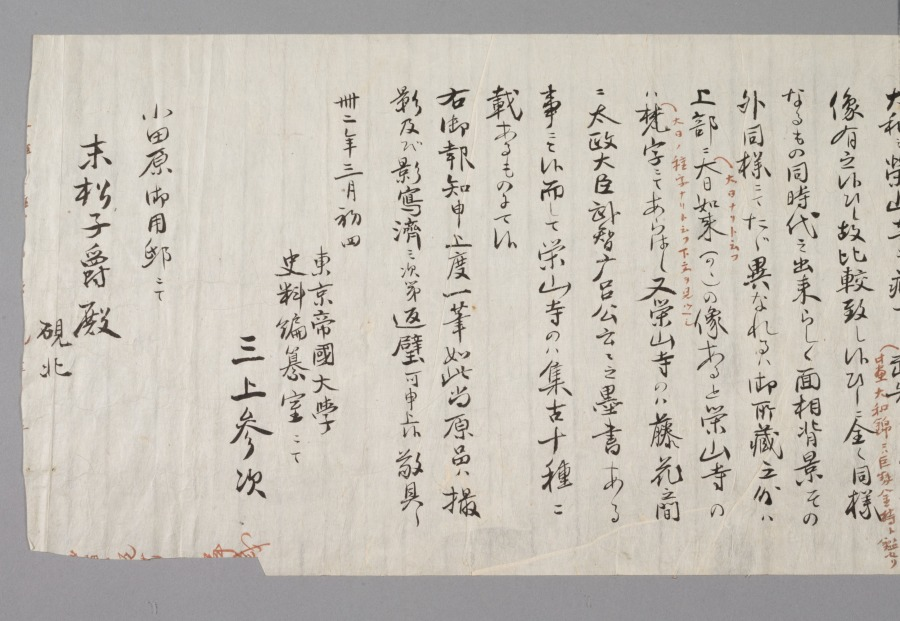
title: Fujiwara no Muchimaro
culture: Japan, Kamakura period (1185–1333)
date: 1200s or 1300s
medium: Hanging scroll; ink, color, gold, and cut gold on silk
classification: Painting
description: This portrait of Fujiwara no Muchimaro (680–737), a grandson of Fujiwara no Kamatari (614–669), includes an image of Buddha Dainichi Nyorai above his head. By situating the image of Dainichi there, this painting would seem to assert that Muchimaro is an avatar of Dainichi. In the same way that kami could be identified with Buddhist counterparts, powerful humans could also be seen as manifestations of Buddhist deities. A similar painting is at Eizanji in Nara, of which Muchimaro is known as the founder. It was once a branch temple of Kōfukuji, the Fujiwara family temple.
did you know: The boughs of wisteria appearing in the background symbolize the figure's status as a Fujiwara family member.